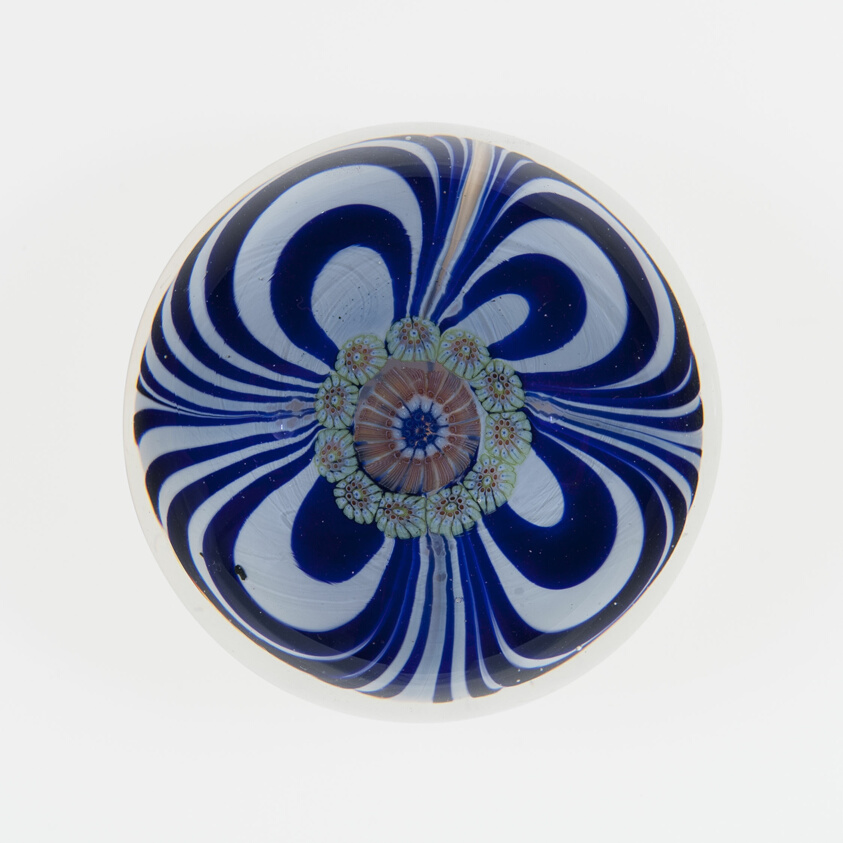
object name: Glass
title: Paperweight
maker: Saint-Louis Glassworks (Cristalleries de Saint-Louis); Lorraine, France, founded 1586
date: 1848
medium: Glass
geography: Saint-Louis-lès-Bitche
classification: paperweight; glass